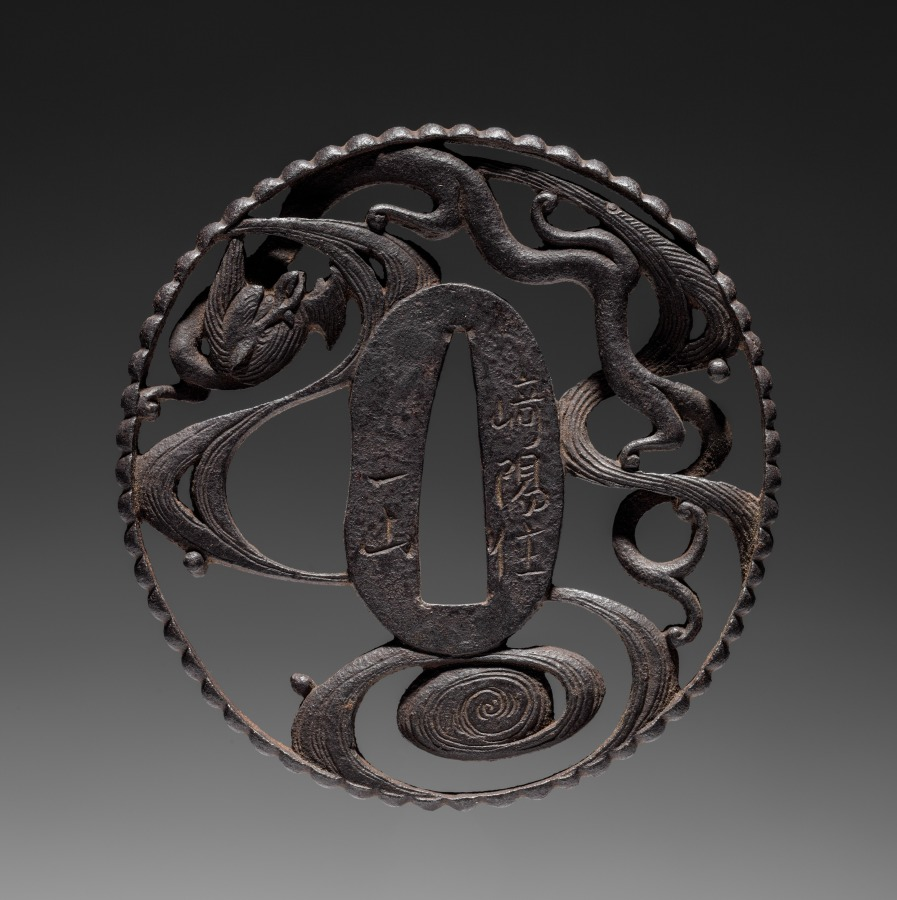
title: Sword Guard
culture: Japan, Edo period (1615–1868)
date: early 1800s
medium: iron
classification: Arms and Armor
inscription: signed "Issan, residing at Nagasaki."